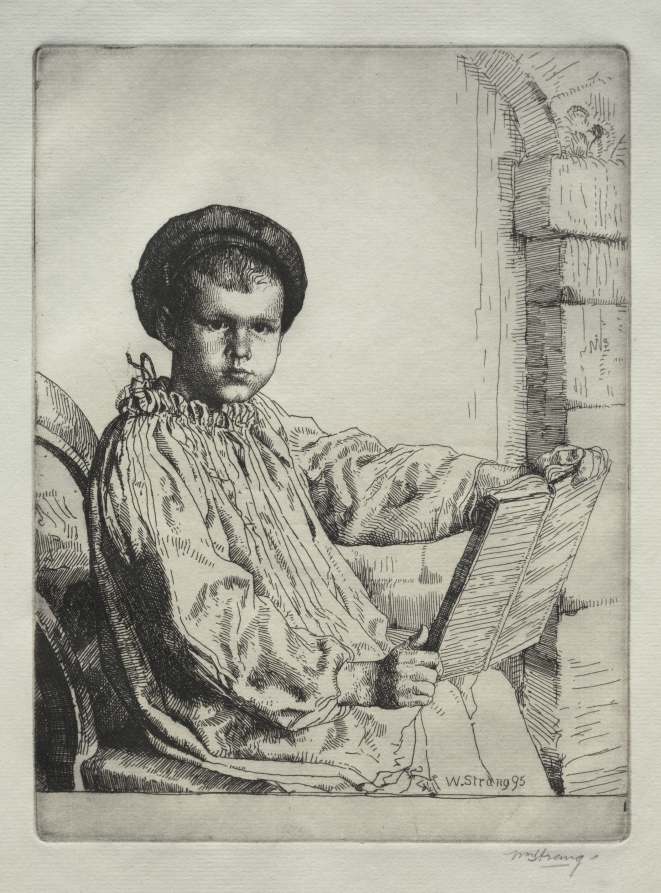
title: David R. Strang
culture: England, late 19th Century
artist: William Strang (British, 1859–1921)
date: 1895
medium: etching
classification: Print